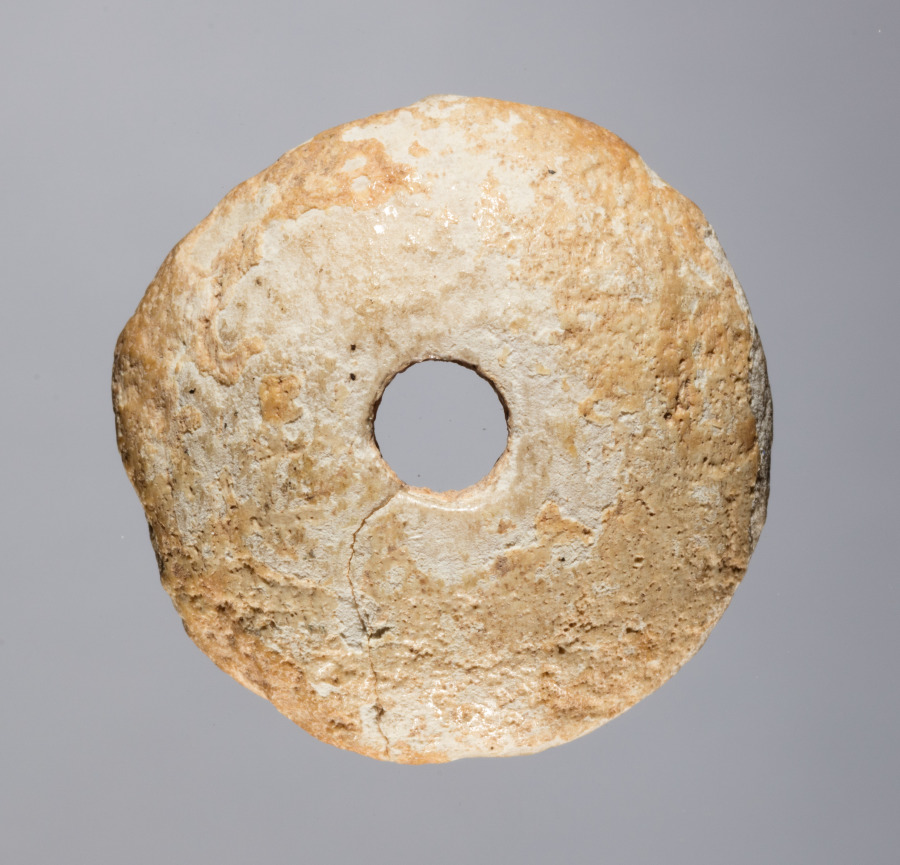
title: Spindle Whorl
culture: Iran, early Islamic period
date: 700s - 900s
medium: bone, incised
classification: Spindle Whorl